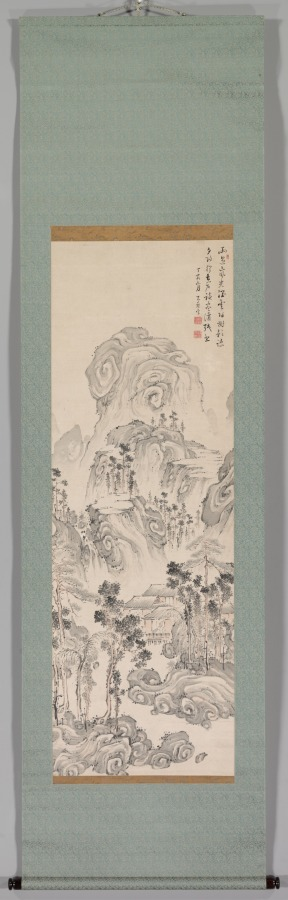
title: Landscape with Gentle Peaks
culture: Japan, Edo period (1615–1868)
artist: Kan Tenju (Japanese, 1727–1795)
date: 1767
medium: hanging scroll; ink and light color on paper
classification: Painting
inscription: 雨過嵐光煙／雲陽樹影諫／夕陽独在左／？卷讀残書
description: A figure sits in a retreat tucked into the mountains near a waterfall. The painter, Kan Tenju, was best known as a calligrapher and seal carver. Of Korean heritage, he was a patron of artist Ike Taiga (池大雅) (1723–1776), and a cousin of Taiga’s student Aoki Shukuya (青木 夙夜) (died 1802). His Chinese-style poem reads as follows: Smoky mist in the mountain reflects light after the rain, Sunlight passes through the clouds to cast shadows of the trees, Alone in the sunset, I read a well-worn book.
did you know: This painting combines image and calligraphy, connected by skillful brushwork.